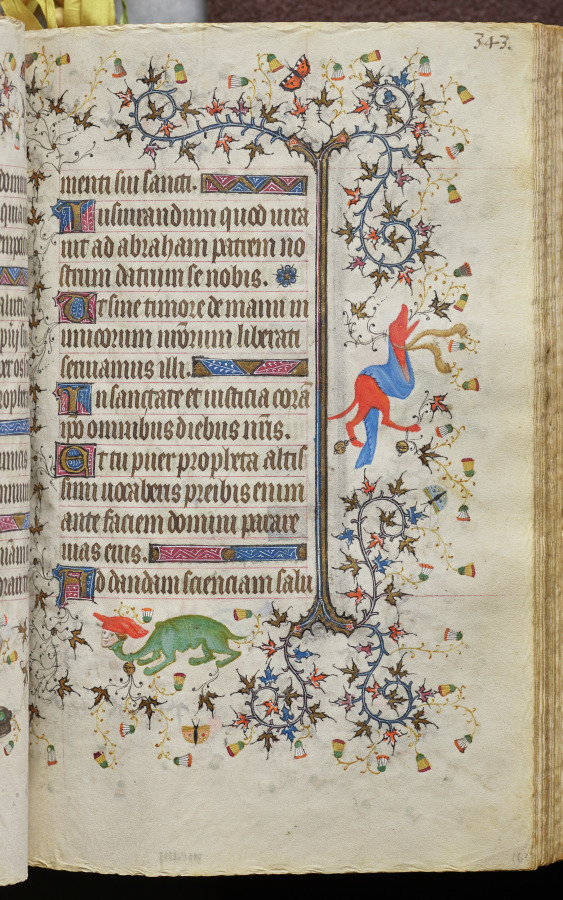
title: Hours of Charles the Noble, King of Navarre (1361-1425): fol. 167r, Text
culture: France, Paris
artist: Master of the Brussels Initials and Associates (French)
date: c. 1405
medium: ink, tempera, and gold on vellum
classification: Bound Volume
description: This precious volume was obviously highly prized by its owner, the French-born King of Navarre, who had his coat of arms painted on no less than twenty folios. Rather than directly commissioning this manuscript from a specific workshop, it seems that Charles the Noble acquired his book of hours -- perhaps ready-made for the luxury market -- while on a trip to Paris in 1404-05. A collaborative effort, six painting styles are evidenced within the pages of this codex, those of two Italians, two Frenchmen, and two Netherlanders. The painter who was responsible for the planning and decoration of the book, and who produced seventeen of the large miniatures, was a Bolognese artist known as the Master of the Brussels Initials. His principal assistant, responsible for most of the borders, was a Florentine who signed his name "Zecho" da Firenze on folio 208 verso.